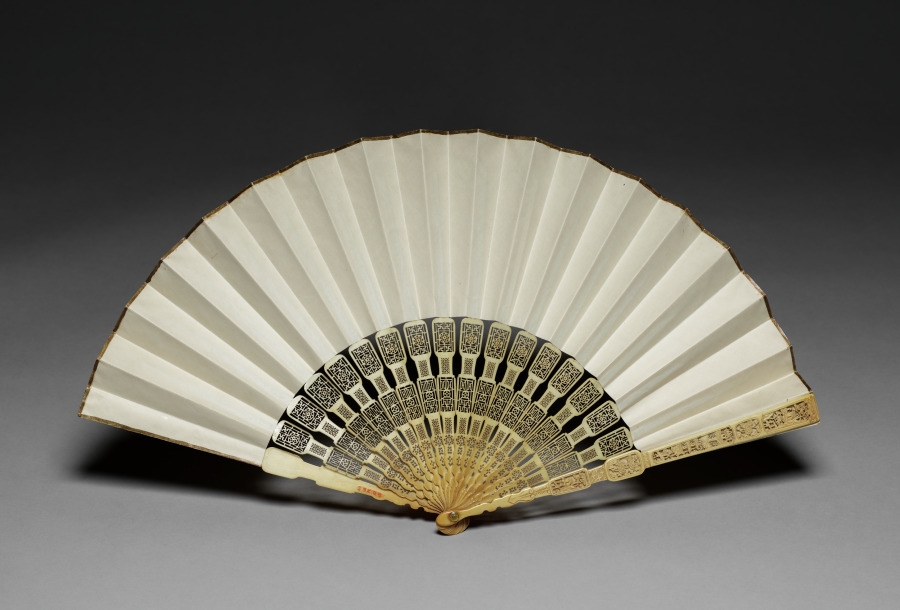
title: Fan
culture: Europe, first half 19th century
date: 1800–1850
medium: ivory, painted paper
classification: Miscellaneous